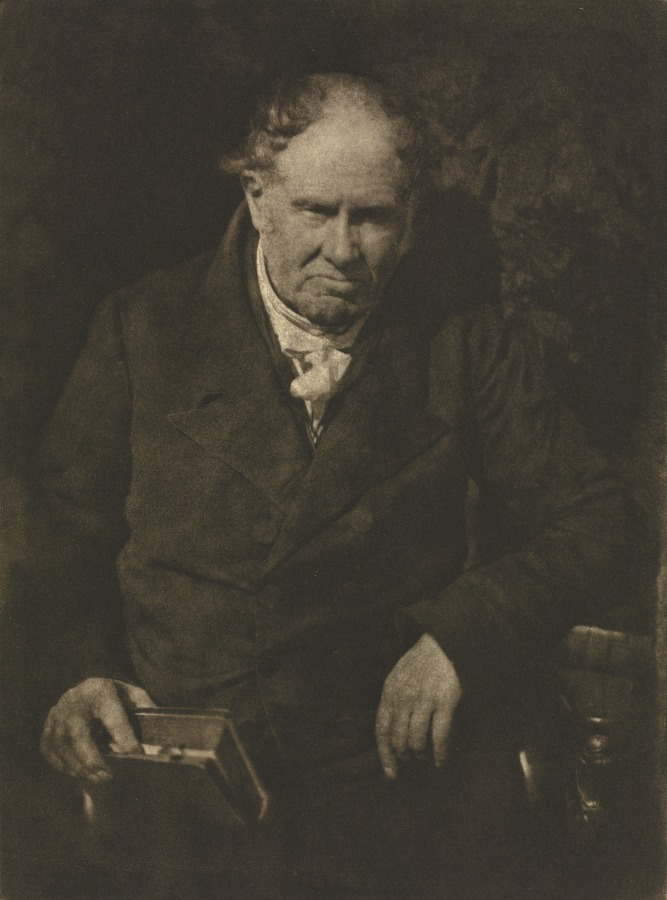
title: Camera Work: Dr. Munro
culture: England, 20th century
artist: David Octavius Hill (British, 1802–1870)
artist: and Robert Adamson (British, 1821–1848)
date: 1905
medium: photogravure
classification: Bound Volume